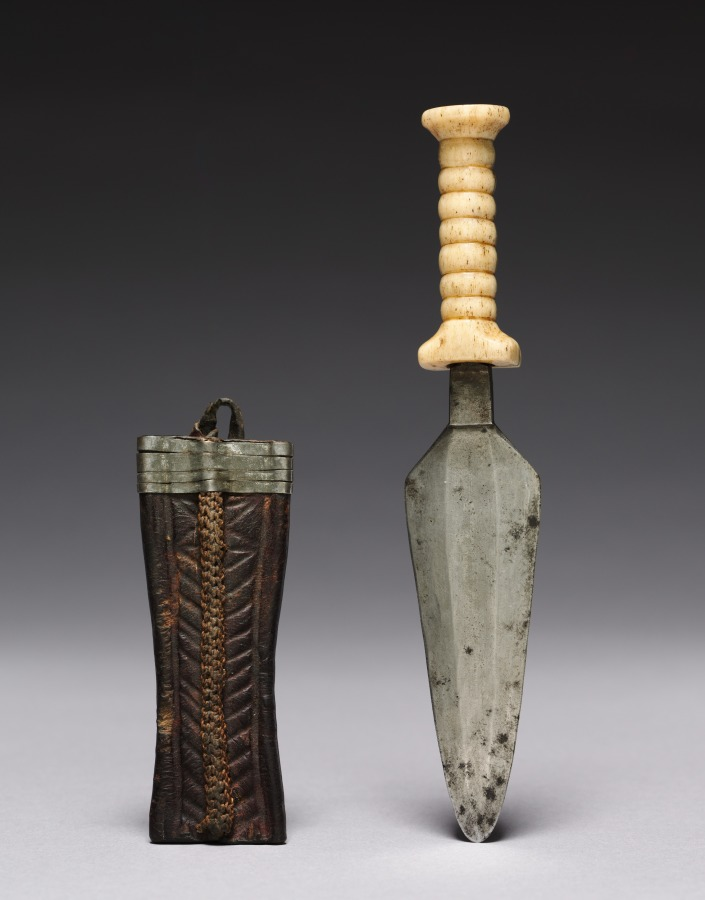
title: Dagger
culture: Africa, Central Africa, Democratic Republic of the Congo, Mangbetu-style maker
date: 1900s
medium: Iron, elephant ivory, leather, and tin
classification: Arms and Armor